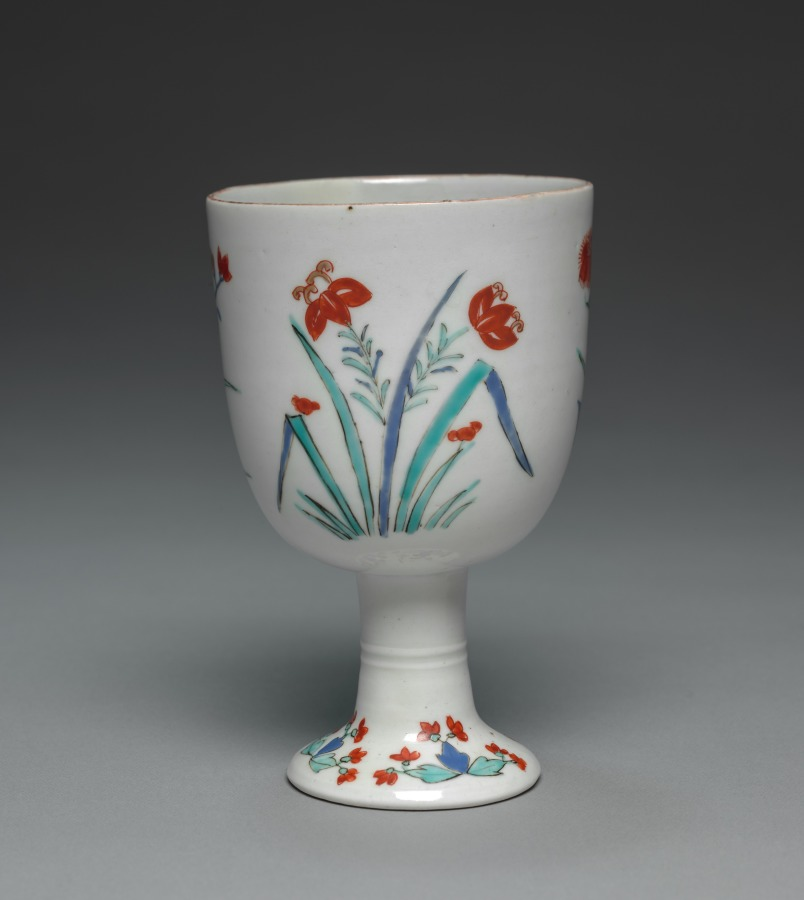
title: Goblet with Flowers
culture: Japan, Edo period (1615–1868)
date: c. 1700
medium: porcelain with overglaze color enamel and gold (Hizen ware Ko-Imari style)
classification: Ceramic